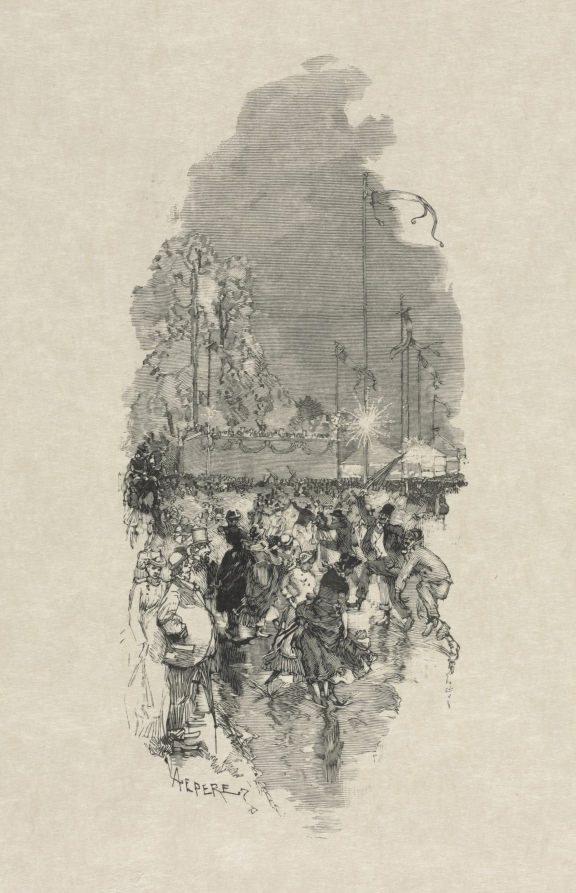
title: Festival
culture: France, 19th century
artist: Auguste Louis Lepère (French, 1849–1918)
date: c. 1870–1918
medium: wood engraving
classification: Print